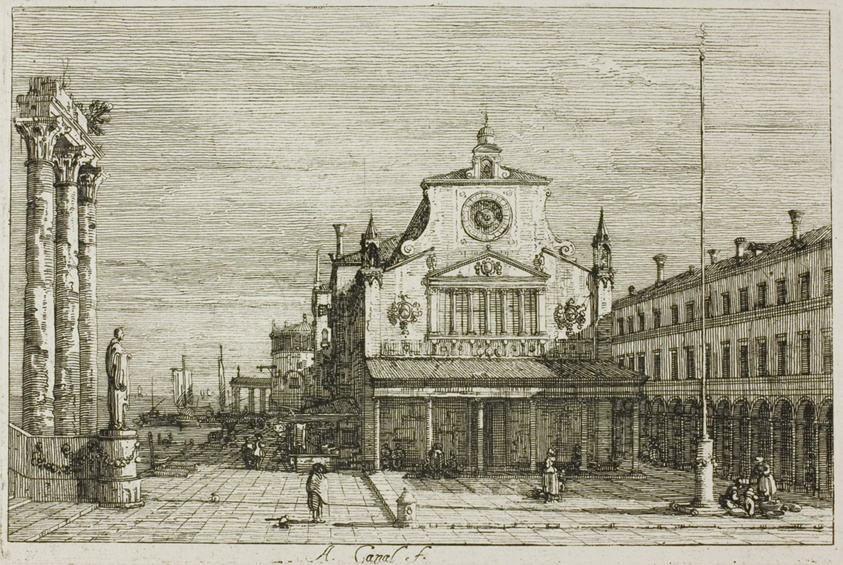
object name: Print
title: Imaginary View of S. Giacomo di Rialto, from Vedute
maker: Canaletto (Italian, 1697-1768)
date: 1735/44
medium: Etching in black on ivory laid paper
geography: Italy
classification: etching; print; prints and drawing